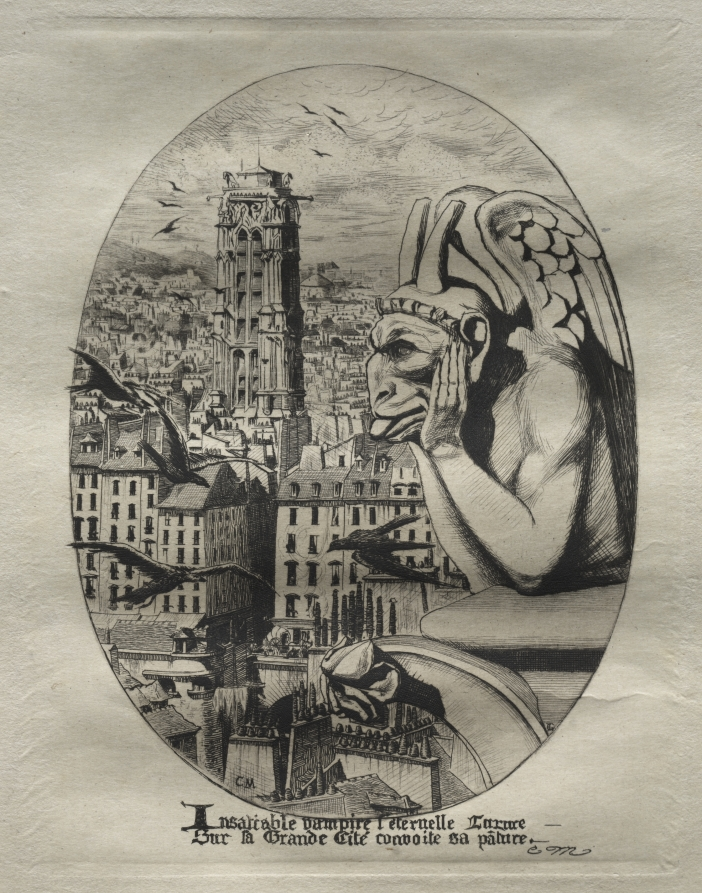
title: Le Stryge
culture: France, 19th century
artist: Edmond Gosselin (French)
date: c. 1853–81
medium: etching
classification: Print